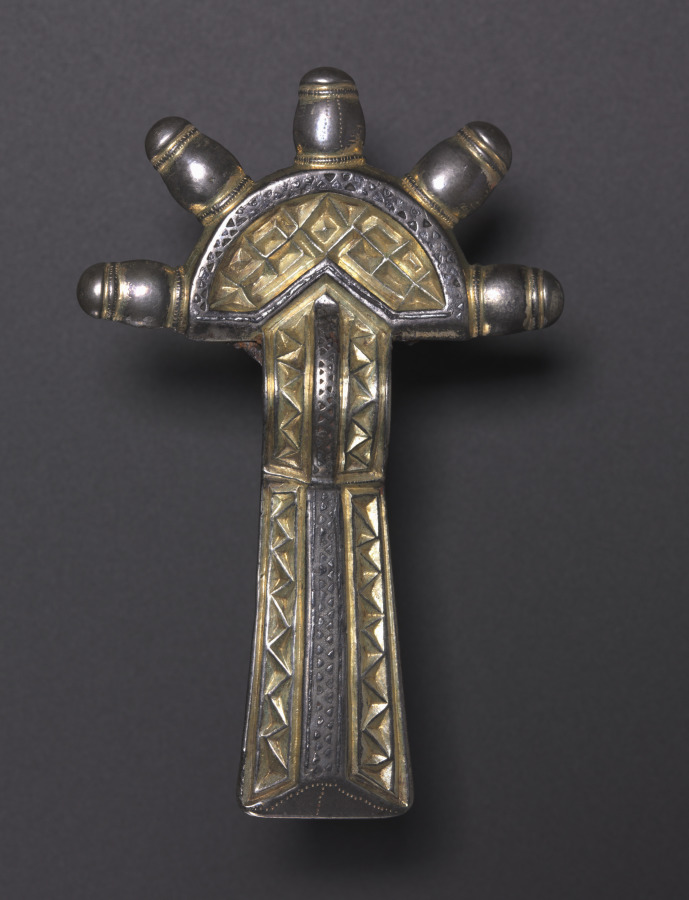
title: Bow Fibulae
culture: Alemannic, 6th century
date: 500–550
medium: silver gilt and niello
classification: Jewelry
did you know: This type of fibula, or pin, is also called a "digitized fibula" because of its radiating knobs that resemble fingers.